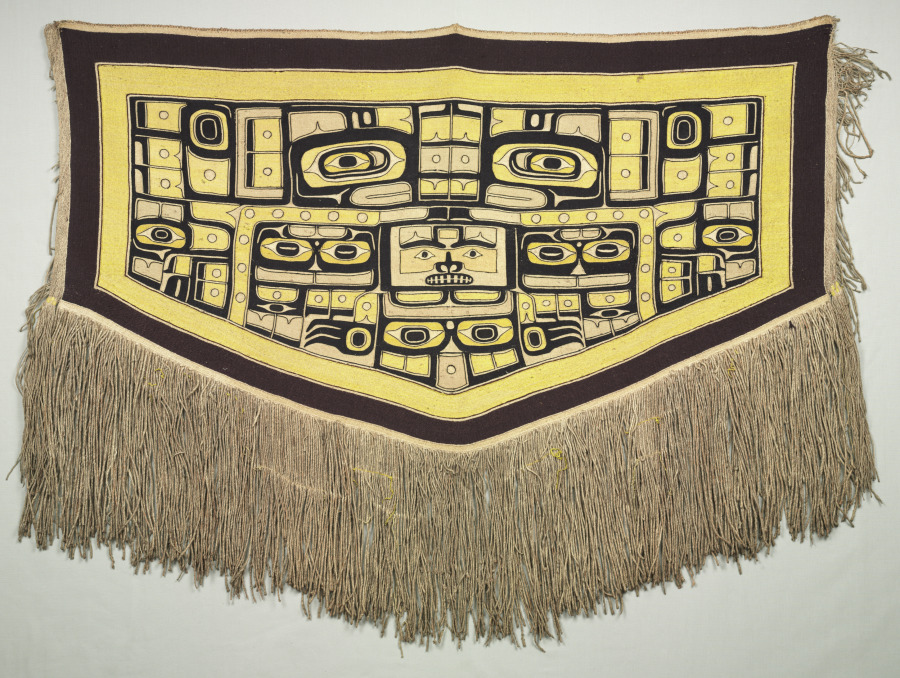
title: Ceremonial Garment (Naaxein) (Chilkat Blanket)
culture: America, Native North American, Northwest Coast, Tlingit, late 19th century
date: late 1800s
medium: weft twining: cedar bark wrapped with mountain goat hair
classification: Textile